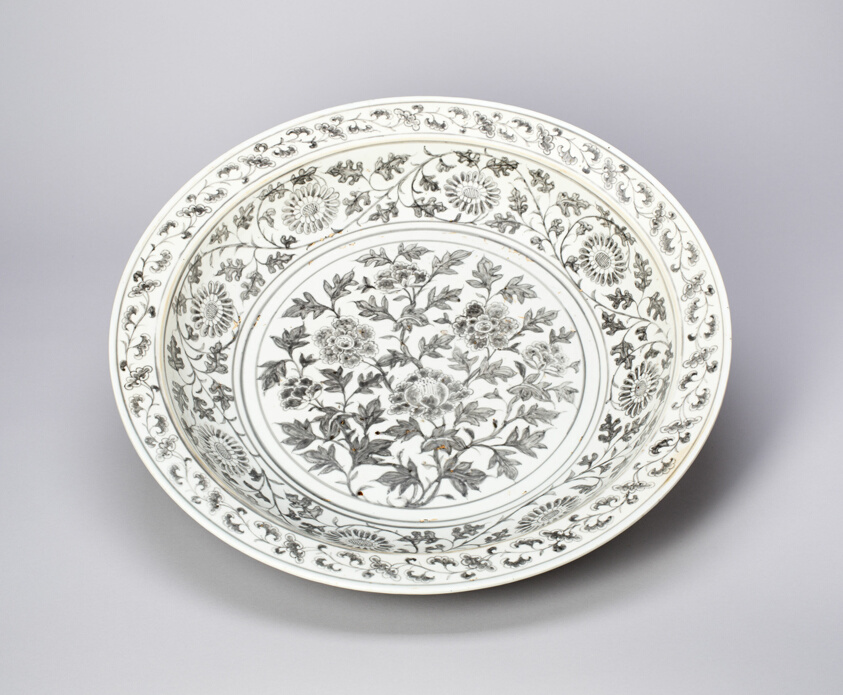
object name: Decorative Arts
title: Shallow Dish with Peony Scrolls, Chrysanthemum Spray, and Key-Fret Border; Lotus Petal under RimShallow Dish with Peony Scrolls, Chrysanthemum Spray, and Key-Fret Border; Lotus Petal under RimShallow Dish with Peony Scrolls, Chrysanthemum Spray, and Key-Fret Border; Lotus Petal under Rim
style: Chinese (culture or style)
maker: China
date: Ming dynasty (1368–1644), late 14th century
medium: Porcelain painted in underglaze red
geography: China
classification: dish (vessel); porcelain; asian art; ceramics; decorative arts